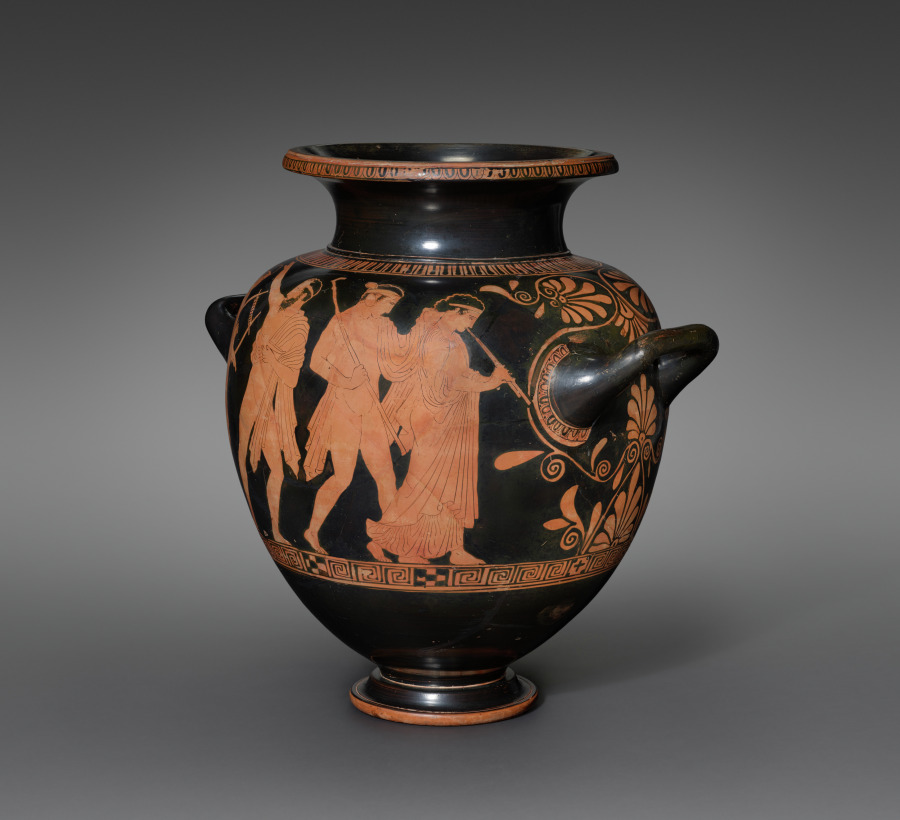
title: Red-Figure Stamnos (Mixing/Storage Vessel): Komos (Musicians and Revelers)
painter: attributed to Kleophon Painter (Greek, Attic, active c. 440–410 BCE)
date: c. 435–425 BCE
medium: Ceramic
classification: Ceramic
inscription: Κ Α Λ Ο Σ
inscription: Κ Α Λ Ο [Σ]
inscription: black '080'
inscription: black 'WF2'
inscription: black '0.19'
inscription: red '09.6'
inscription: partially removed red and white sticker, with number blacked out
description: Four lively figures move to the right across the front side of this stamnos, a vase used for storing and mixing wine. First comes a finely dressed woman playing the pipes, followed by three male figures, all nearly nude. The bearded one holds a drinking cup and reaches back, perhaps dancing, while the last in line concentrates on the music of his lyre.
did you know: The Athenian stamnos, a shape favored by the Etruscans, was made primarily for export.